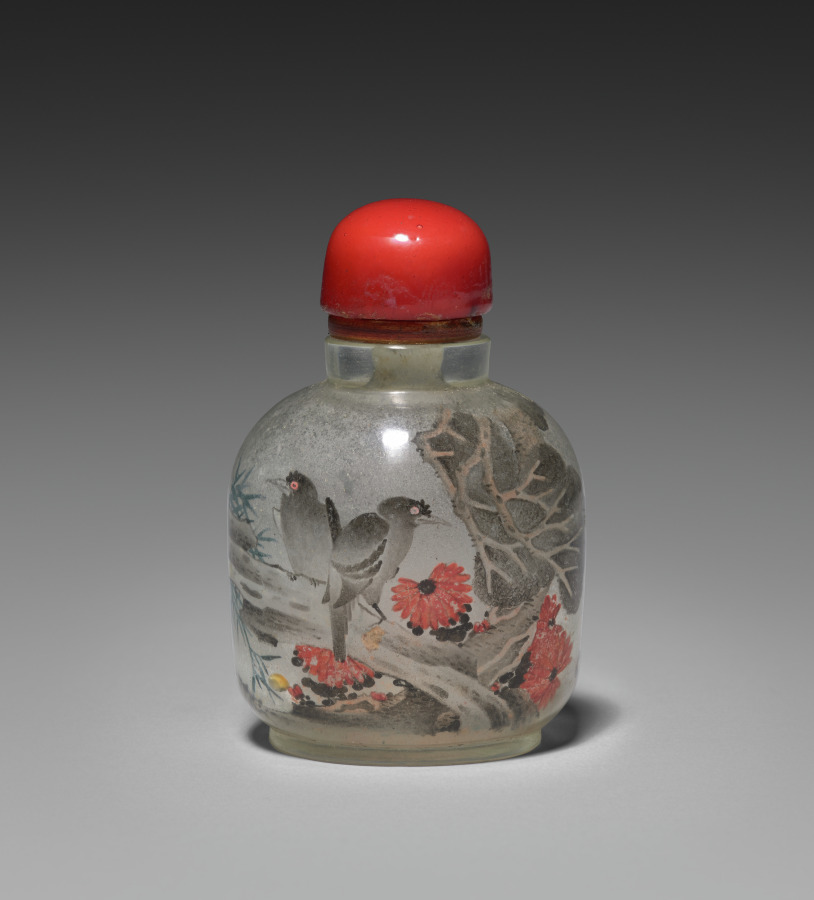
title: Snuff Bottle with Stopper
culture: China, Qing dynasty (1644–1911), Qianlong reign (1736–95)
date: 1736–95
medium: crystal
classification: Stone